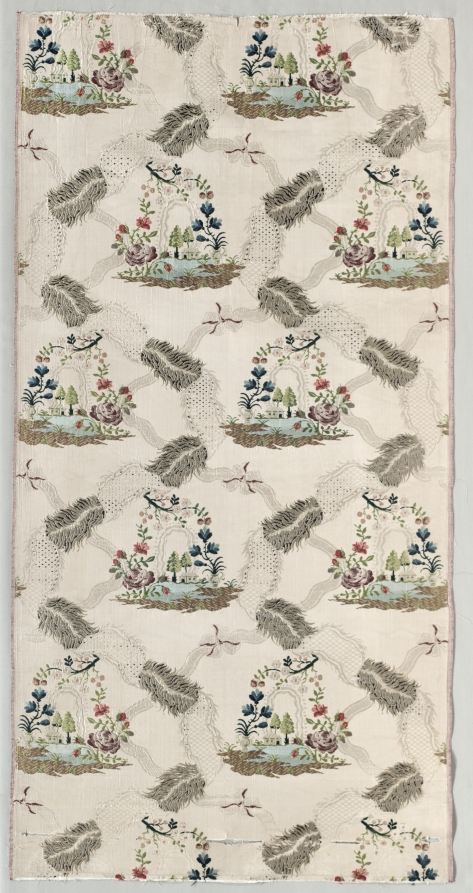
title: Silk Brocade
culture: England, Spitalfields ?, 18th century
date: 1700s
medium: silk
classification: Textile